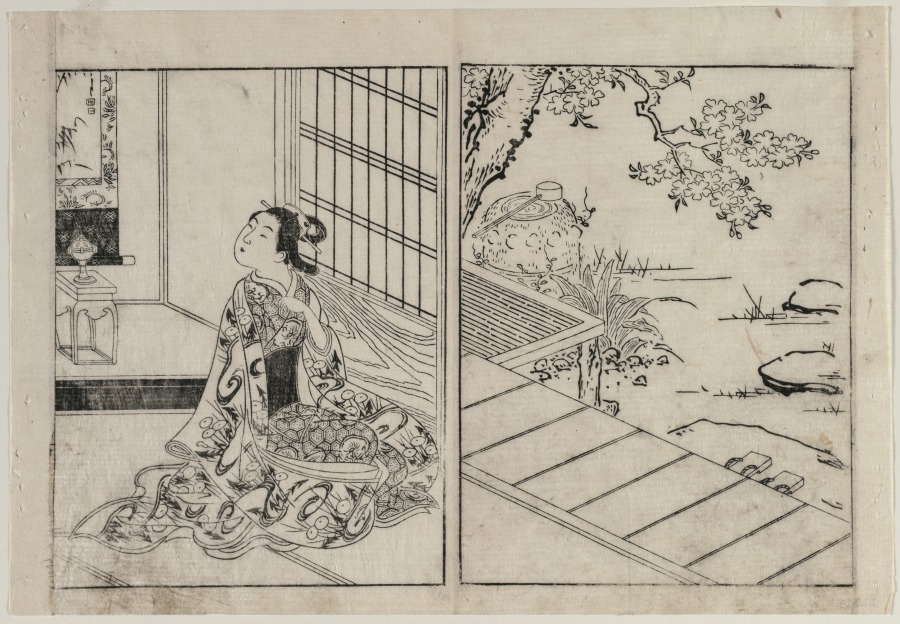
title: Woman Looking at a Hanging Scroll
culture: Japan, Edo period (1615–1868)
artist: Nishikawa Sukenobu (Japanese, 1671–1754)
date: c. 1740s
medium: color woodblock print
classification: Print